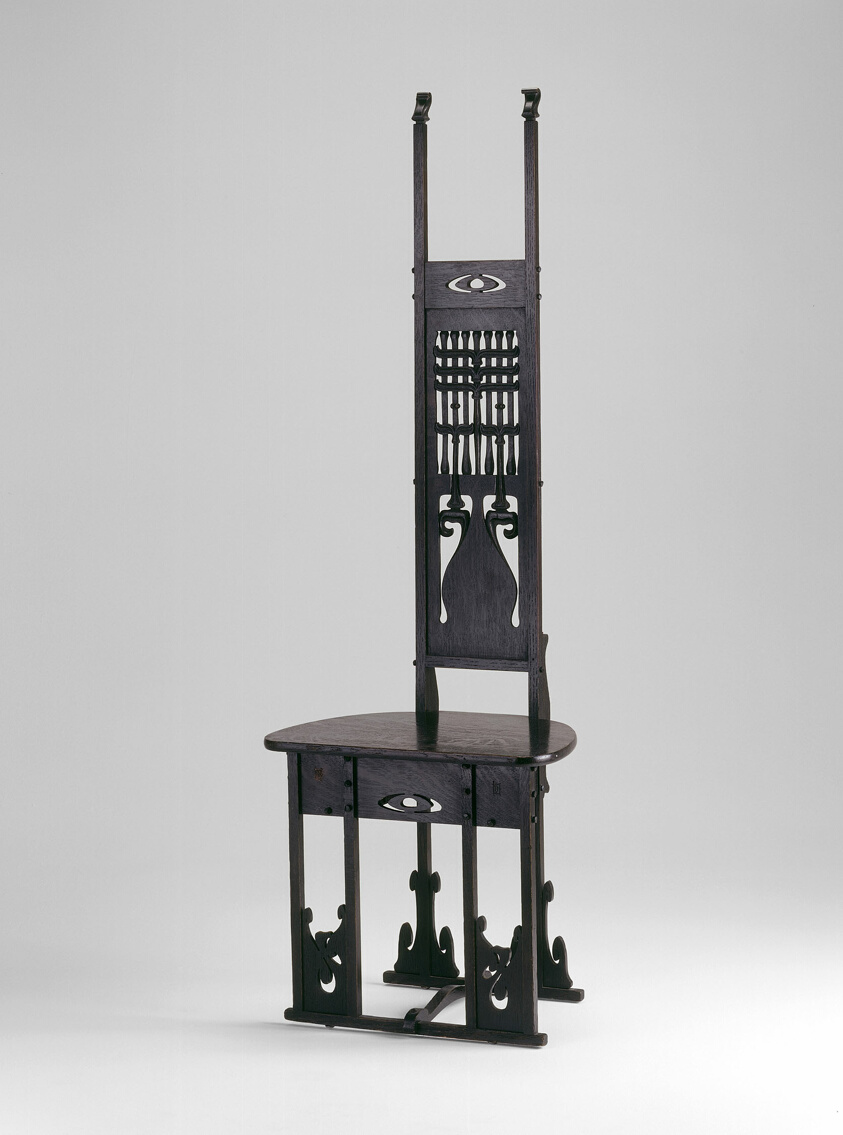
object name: Furniture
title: Hall Chair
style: Arts and Crafts Movement, American Arts and Crafts Movement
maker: Charles Rohlfs (American, 1853–1936)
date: c. 1900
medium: Oak with black stain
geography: Buffalo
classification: seating; furniture; american decorative arts; american arts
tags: Chicago, furniture